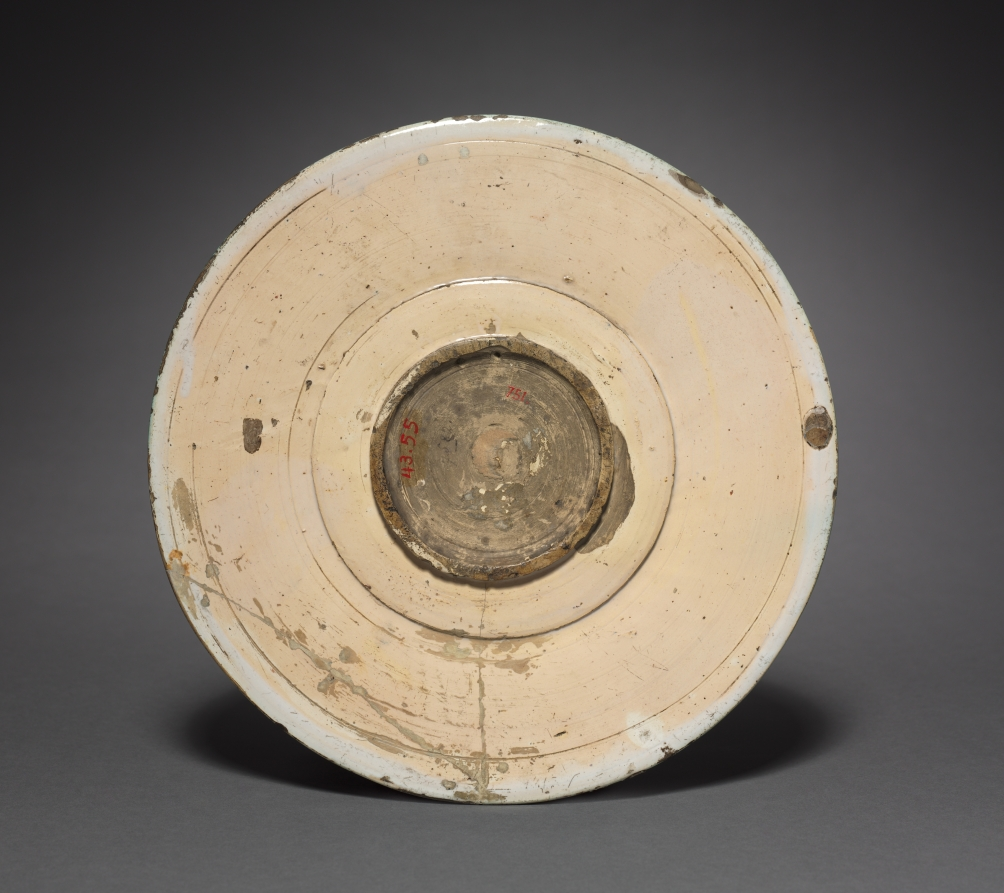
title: Plate Depicting Christ’s Passion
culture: Italy, Florentine region, Cafaggiolo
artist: attributed to Painter of the Royal Procession (Italian)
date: c. 1510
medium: tin-glazed earthenware (maiolica)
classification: Ceramic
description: The painted scenes on this plate depicting the Passion of Christ include the betrayal of Jesus by his disciple Judas (right); the arrest and condemnation by the Jews (left); the bearing of the cross (top); the Crucifixion (middle); and the resurrection (bottom). At least one of the scenes (the condemnation or the Scourging at the Pillar) is based on a Florentine woodcut from the devotional writings of Girolamo Savonarola (1452–1498).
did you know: During the Renaissance, scenes from the Christian Bible were prominently featured on maiolica, covering the surface in a style called istoriato (decorated with stories).